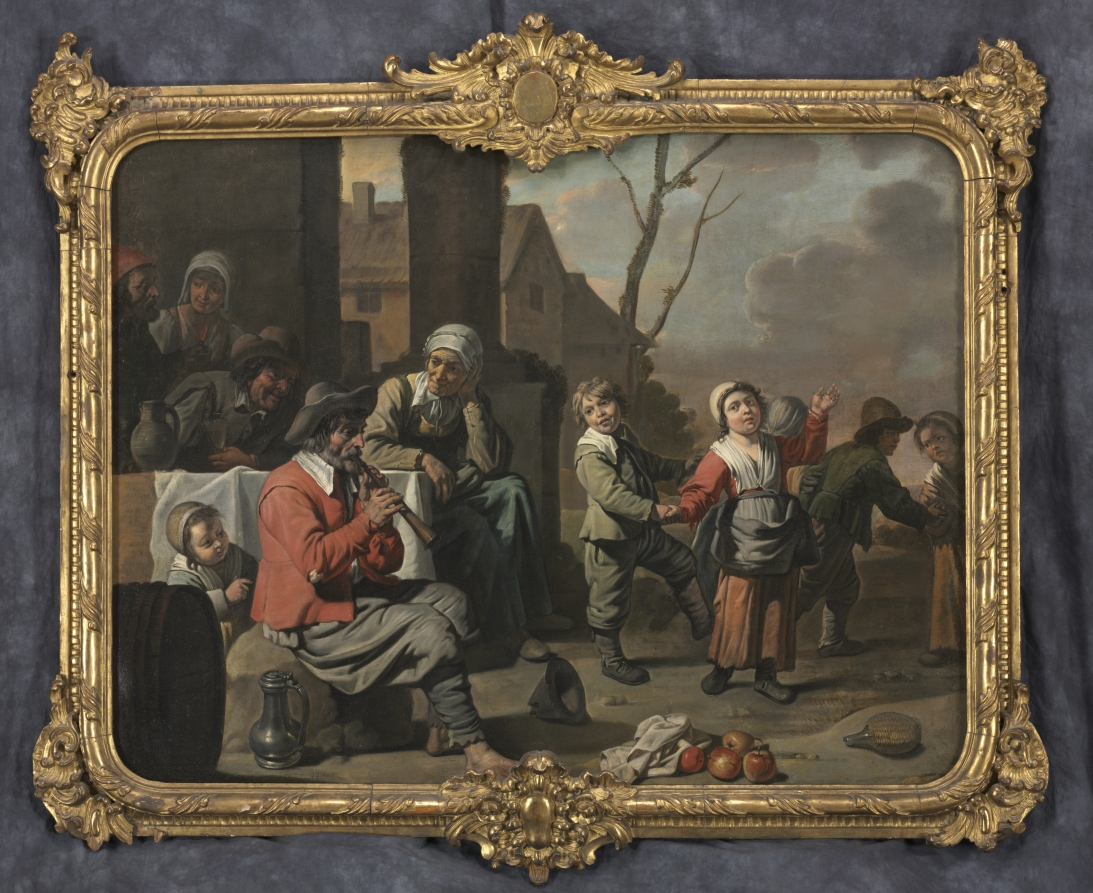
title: Peasant Children Dancing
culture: France, 17th century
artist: circle of Le Nain (French)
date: 1650s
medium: oil on canvas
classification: Painting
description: This scene of outdoor, rustic frivolity was probably painted by the Master of the Béguins, a Flemish imitator of the Le Nain brothers who capitalized on their success around the 1650s in Paris. Distinct features of this artist's style are the wide eyes, pudgy cheeks, and white peasant caps—béguins—that give the artist his name. The sturdy and comical peasants, clothed in coarse fabrics with heavy folds, and the use of earthen tones emphasize the provincial mood. During the mid-17th century, the treatment of the poor and lower classes was a subject of great debate in the Catholic Church in Paris, especially at Saint Sulpice, where the Le Nain brothers were buried. Scenes of everyday workers or peasants were incredibly popular, drawing on both comic, Flemish genre scenes of drinking and the French interest in carefully observed, realistic details. Although the picture's meaning remains ambiguous, the gaiety of this world comes from the wonderfully naturalistic details, such as the worn hole on the piper's elbow, the villagers' cheerful expressions, and still-life details such as the ripe apples and reflective drinking vessel.